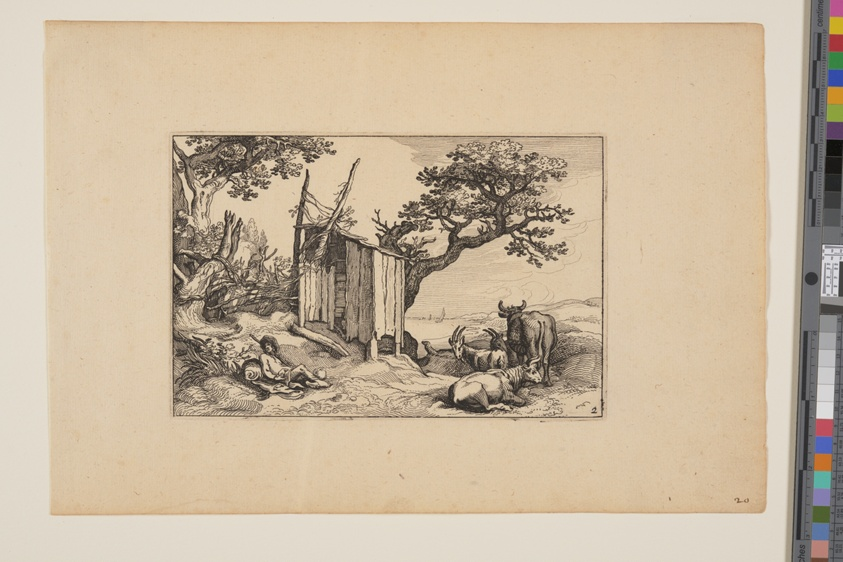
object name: Print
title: Dilapidated Barn with Herd and Cattle, from Landscapes (Verscheyden aerdige Lanthuysen...)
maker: Claes Jansz. Visscher (Netherlandish, c. 1550–c. 1612); after Abraham Bloemaert (Dutch, 1566–1651)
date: 1620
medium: Etching on ivory laid paper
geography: Netherlands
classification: print; paper; prints and drawing; etching